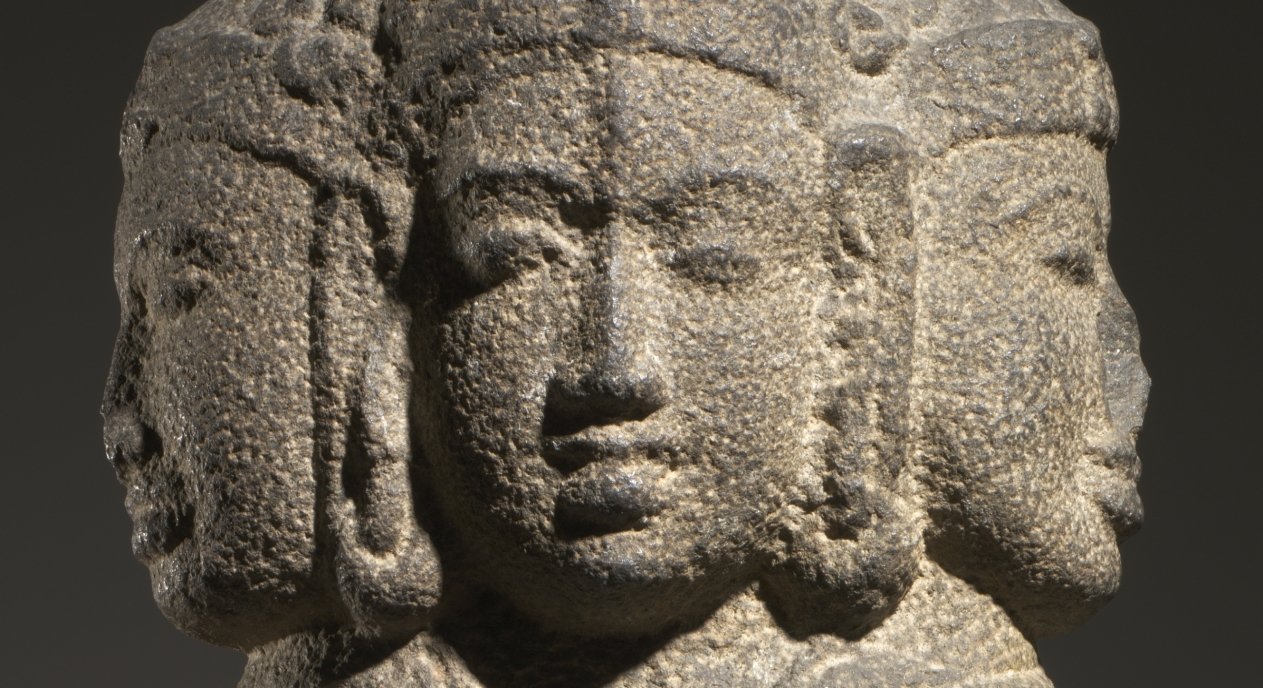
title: Brahma-Shiva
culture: South India, Tamil Nadu, Chola dynasty, late 10th - early 11th century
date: late 900s–1000s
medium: granite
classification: Sculpture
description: In the Hindu pantheon Brahma is in charge of carrying out the work of creation. In this tour-de-force of South Indian temple sculpture, he is in a special regal aspect, with the only elements of his typical priestly appearance being the prayer beads and the matted dreadlocks piled on his head. Four arms connote superhuman power, and four heads convey the idea that his creative activities spread in all four directions. His upper right hand enjoins freedom from fear, and the lower holds a lotus bud associated with birth and the process of creation. His lowered left hand is held in the gift-giving gesture, suggestive of the gift of creation he will bestow upon the world.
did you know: The back of the sculpture retains the original textured surface from a pointed chisel, suggesting it was in a niche or near a wall, protected from worshippers’ touches.